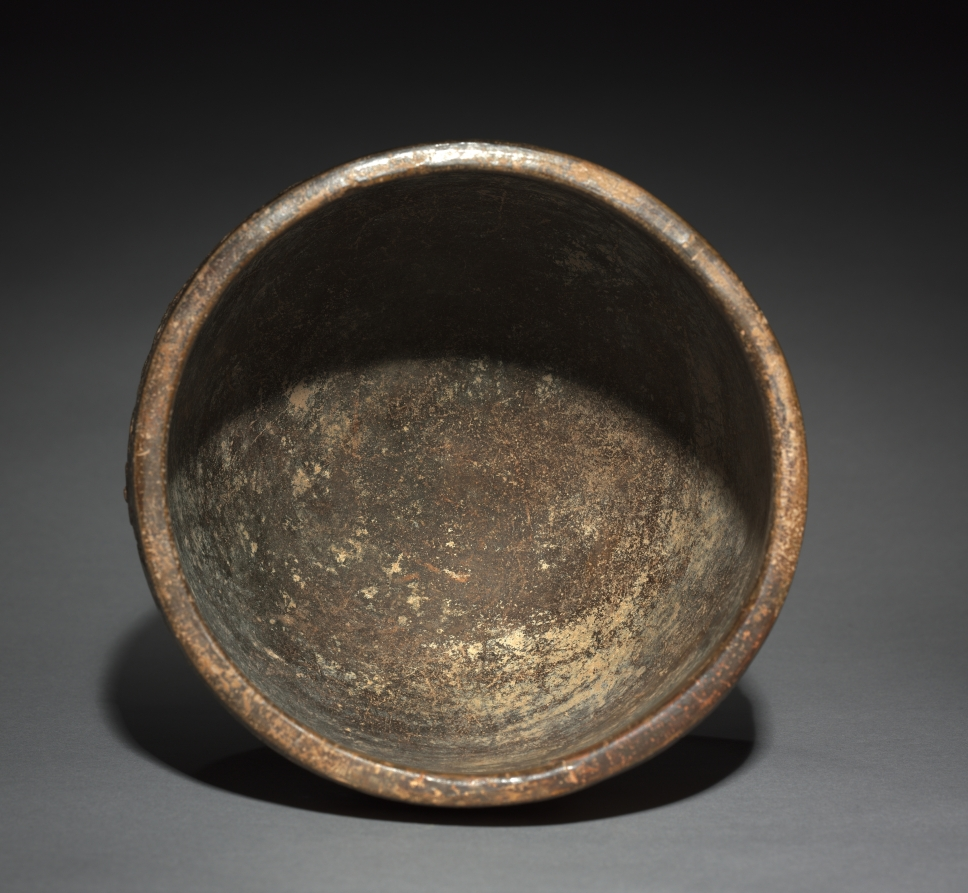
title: Carved Vessel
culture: Mexico, Campeche, Maya, Chocholá Style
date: c. 600–1000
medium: earthenware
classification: Ceramic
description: A firefly is carved on both sides of this Maya vessel, which is from the Yucatán Peninsula. Among the most common of insects to appear in Maya art, the firefly seems to be associated with things that twinkle in the dark—stars and cigars, the latter a symbol that identifies creatures of the night.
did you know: The text on the rim mentions a young man, suggesting this vessel was involved in a rite-of-passage ceremony.